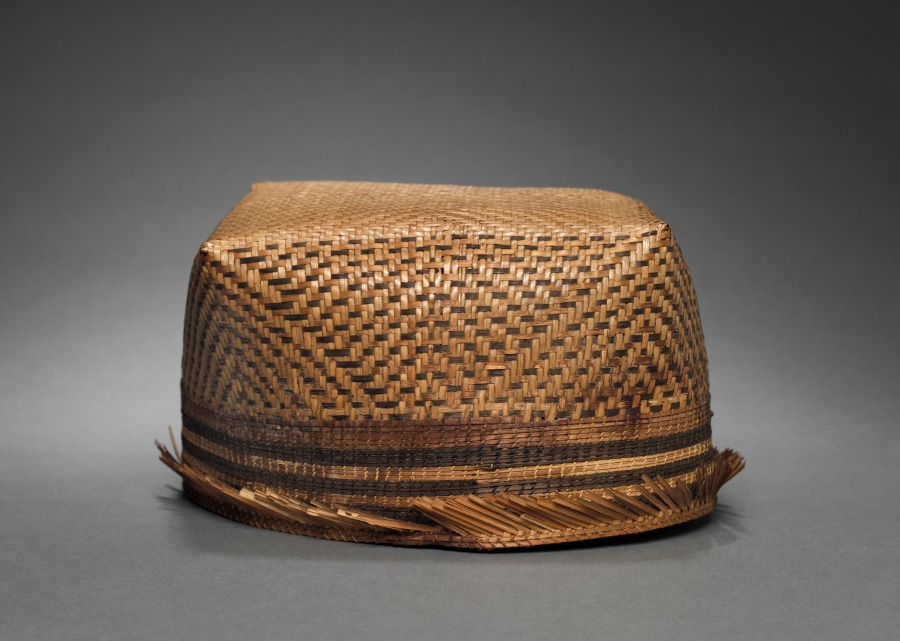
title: Hat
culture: Africa, Central Africa, Democratic Republic of the Congo, Mangbetu, 20th century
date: before 1929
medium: Plant fibers and dye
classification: Garment